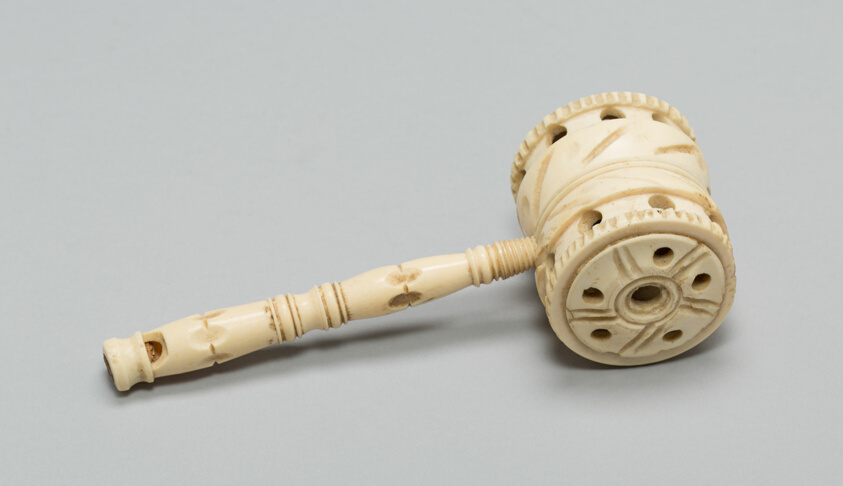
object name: Metalwork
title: Rattle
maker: United States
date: 18th to 19th century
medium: Ivory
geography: United States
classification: ivory; european decorative arts; metalwork